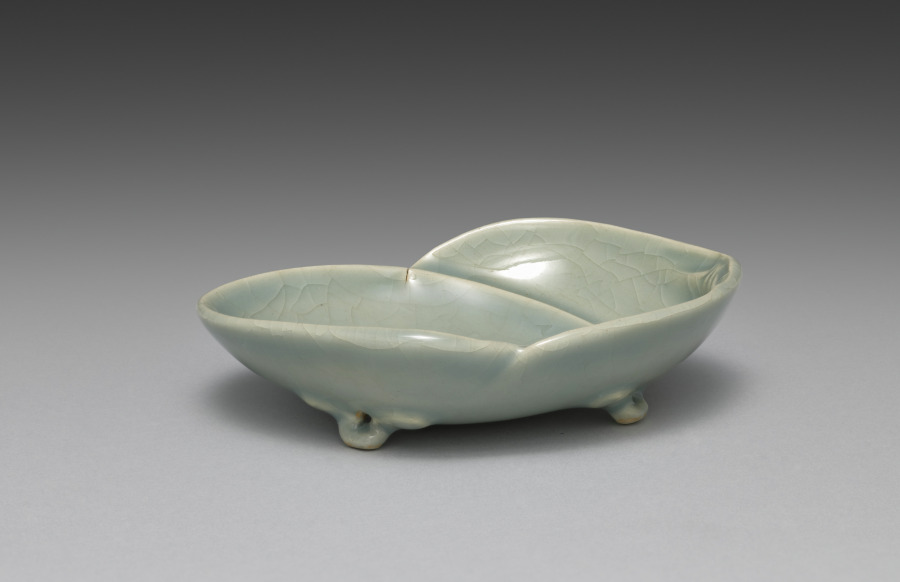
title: Dish from Saucers with Matching Shells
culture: Japan, Meiji period (1868–1912)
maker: Seifū Yohei III (Japanese, 1851–1914)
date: 1893–1914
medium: Porcelain with molded design and green crackled glaze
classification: Ceramic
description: Yohei III’s main output for his sophisticated clientele was in the form of tea sets and dining sets. He created a range of dishes in green glazes. He often produced in pairs, sets of five, or sets of ten. The set of five dishes with a more complex form is described as having a “water-colored glaze” (mizuiroyū). These are shaped like clam half shells, a reference to a game in which shell halves painted with narrative scenes or a variety of motifs must be matched back together by the players. The dishes have molded details to articulate the shell forms, and the crackling across each shell adds another dimension to the surface. Each dish is set on three small feet, formed by a pinched piece of clay and attached to an unglazed area on the underside of the dish. Curiously, while four of the dishes are stamped with the artist’s mark, one has instead a signature carved into the base.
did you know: The saucers are meant to look like matched halves of clam shells in reference to a once popular game.